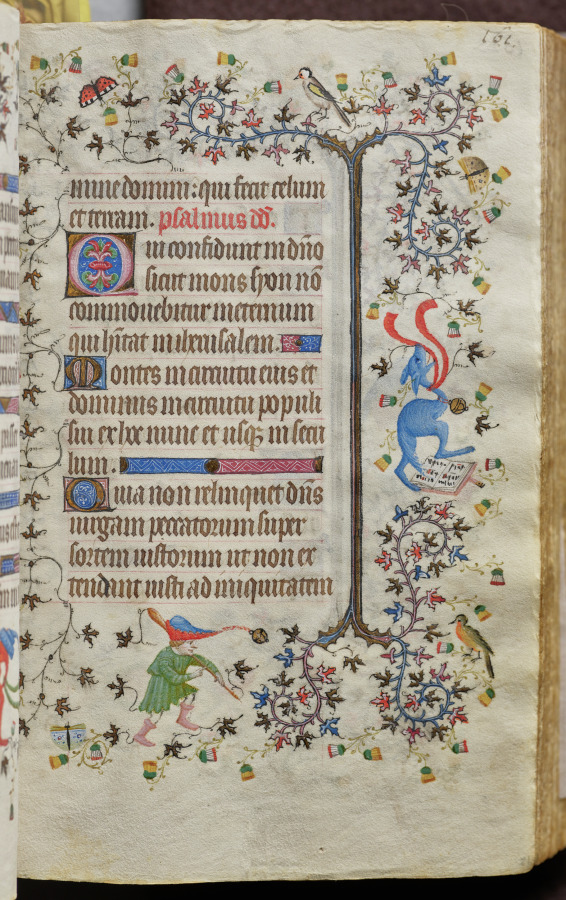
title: Hours of Charles the Noble, King of Navarre (1361-1425): fol. 81r, Text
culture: France, Paris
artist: Master of the Brussels Initials and Associates (French)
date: c. 1405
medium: ink, tempera, and gold on vellum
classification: Bound Volume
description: This precious volume was obviously highly prized by its owner, the French-born King of Navarre, who had his coat of arms painted on no less than twenty folios. Rather than directly commissioning this manuscript from a specific workshop, it seems that Charles the Noble acquired his book of hours -- perhaps ready-made for the luxury market -- while on a trip to Paris in 1404-05. A collaborative effort, six painting styles are evidenced within the pages of this codex, those of two Italians, two Frenchmen, and two Netherlanders. The painter who was responsible for the planning and decoration of the book, and who produced seventeen of the large miniatures, was a Bolognese artist known as the Master of the Brussels Initials. His principal assistant, responsible for most of the borders, was a Florentine who signed his name "Zecho" da Firenze on folio 208 verso.